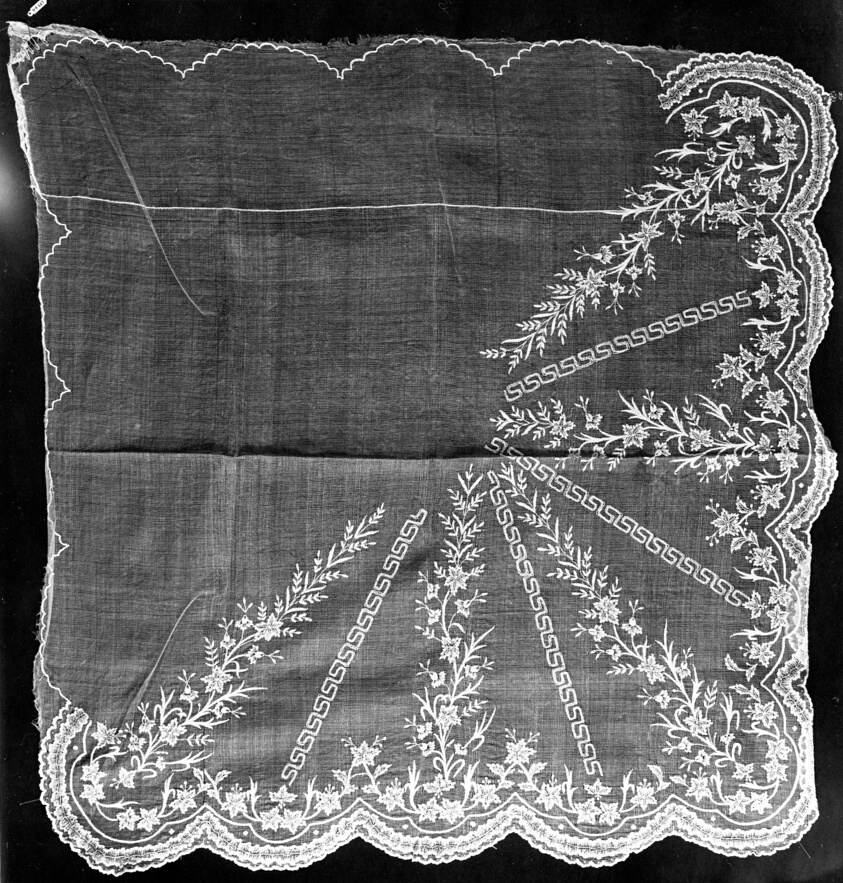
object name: Costume and Accessories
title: One of a pair of sleeves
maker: Philippines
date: 19th century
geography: Philippines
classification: textile; weaving; costume; dress (garment); clothing